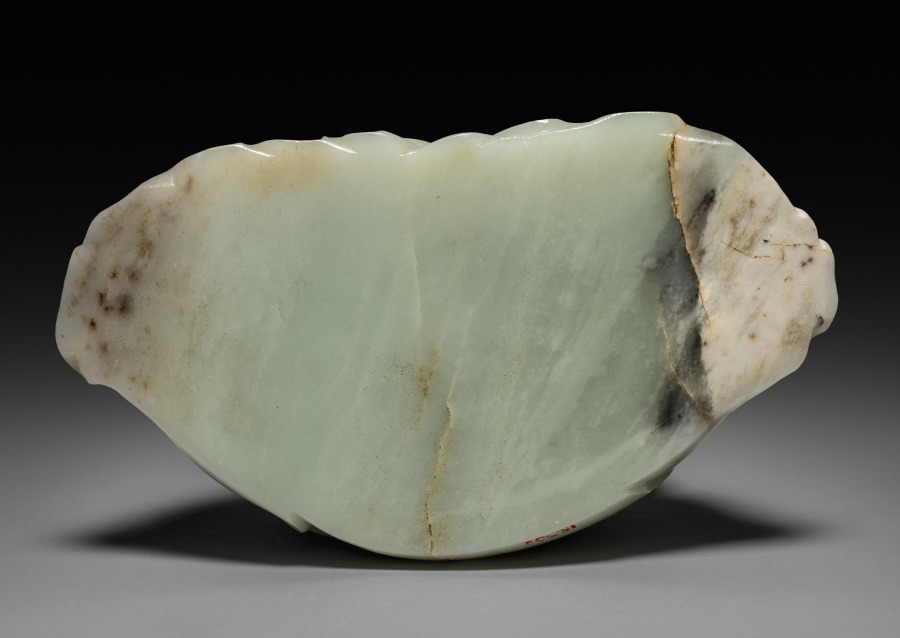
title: Seated Buddha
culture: China, Qing dynasty (1644-1911)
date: 1700s–1800s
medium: jade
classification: Jade